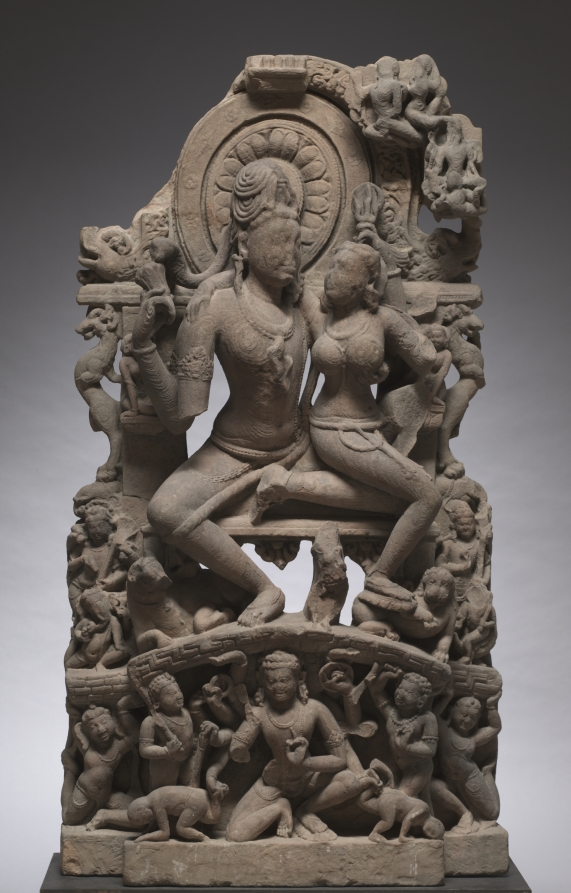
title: Ravana Shaking Mount Kailasa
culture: Central India, Madhya Pradesh, Chandela Dynasty, 8th century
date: 700s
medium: sandstone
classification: Sculpture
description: According to followers of the branch of Hinduism that considers Shiva to be the ultimate, original creator of the universe, he takes on a mythological form and resides in his created world. His home is in the Himalaya Mountains, on Mount Kailasa, where he lives with his wife Parvati. In one episode of Shiva's mythology, he presses down his big toe to quell the ten-armed demon Ravana, who tried to steal Mount Kailasa and take it away to his island. As Ravana was trying to shake the mountain loose, Parvati turned and clung to Shiva in fear— the moment depicted in this magnificent sculpture, which once formed part of a temple exterior. It is thought that Shiva created the world for the sake of his own enjoyment, his lila or divine play, and emanated himself into all the beings of creation: gods and demons, humans and animals. He shrouded their awareness of the reality that they were in essence the god Shiva himself, so that they would perform the actions of his cosmic drama.